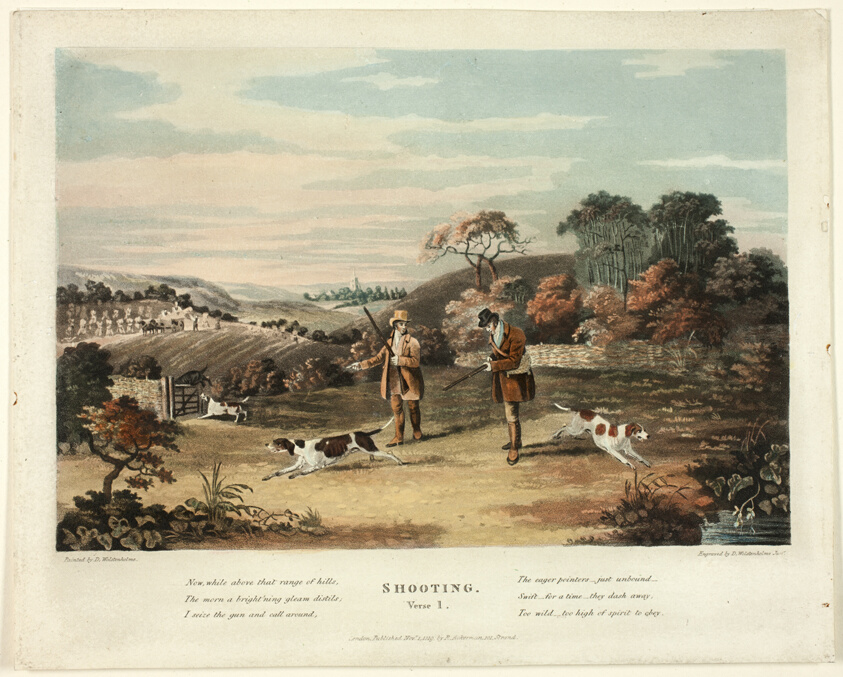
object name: Print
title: Shooting: Verse 1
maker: Thomas Sutherland (English, active c. 1785-1827); after Dean Wolstenholme (English, 1798-1882); published by Rudolph Ackermann (English, born Germany, 1764-1834)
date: 1819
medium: Hand-colored aquatint and etching on ivory wove paper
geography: England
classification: aquatint; print; prints and drawing